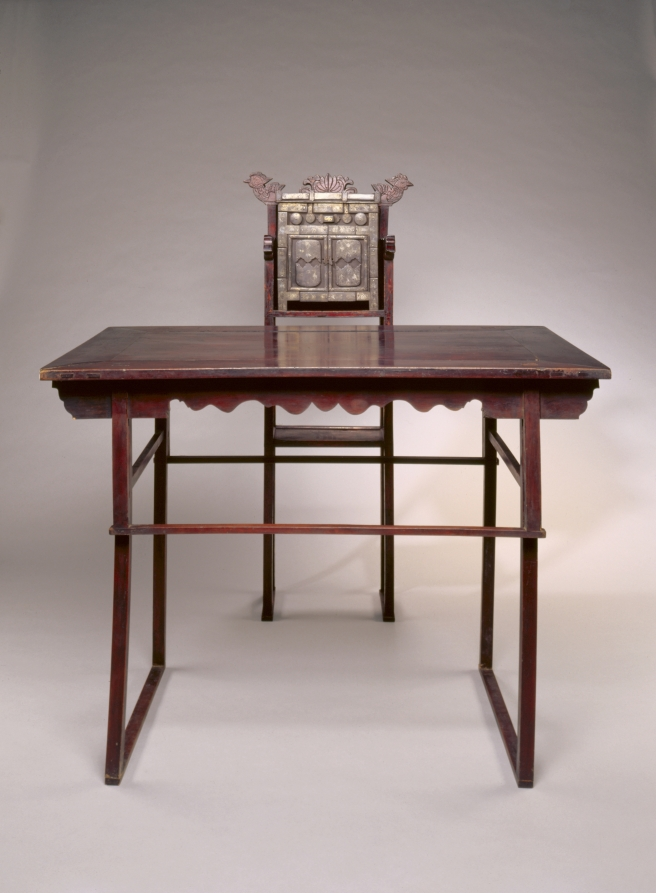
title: Spirit House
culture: Korea, Joseon dynasty (1392–1910)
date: late 1800s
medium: iron inlaid with silver and copper decoration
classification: Metalwork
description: This table, chair, and spirit house form a partial recreation of a memorial altar from the Joseon period. The spirit house and chair both include a number of auspicious symbols, including lotuses, conch shells, and chakra wheels. The spirit house would have been placed on the altar chair, and offerings would have been set out on the table for the memorial service. In ancestor veneration rituals, deceased parents or ancestors are sanctified as spirits who are believed to oversee their descendents. Three times a year, once at the lunar new year, once at the person’s death date, and once at the time of the mid-autumn festival, food would be placed on the table for the ancestors, including fruits, rice, meat, and rice wine. During these ceremonies the worshippers’ attitude was as reverential toward the objects meant to embody the ancestors’ spirits as that toward a living parent.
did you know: The belief in two types of souls, the spiritual and the corporeal, embodied the core concept of ancestor worship in traditional China and Korea. While the corporeal soul is believed to reside in the tomb, the spiritual soul, in the spirit house like this example, guards his or her decedents.